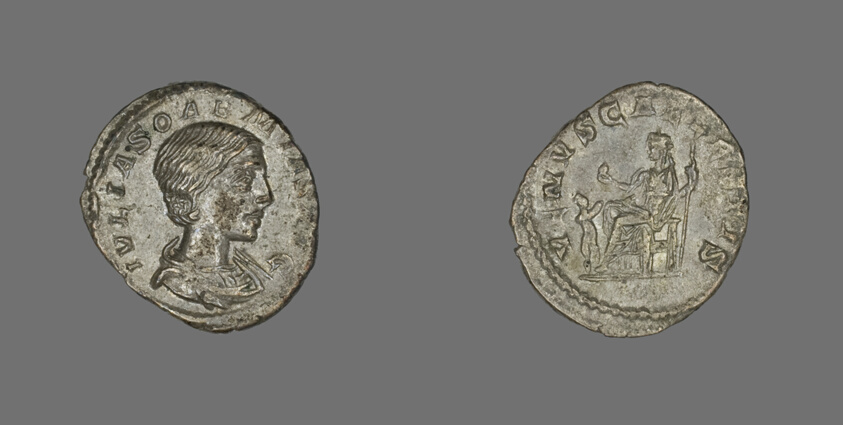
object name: Coin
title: Denarius (Coin) Portraying Julia Soaemias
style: roman (ancient, style or period), ancient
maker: Roman; minted in Antioch (now Turkey)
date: 218-222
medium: Silver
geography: Roman Empire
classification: coin; ancient art